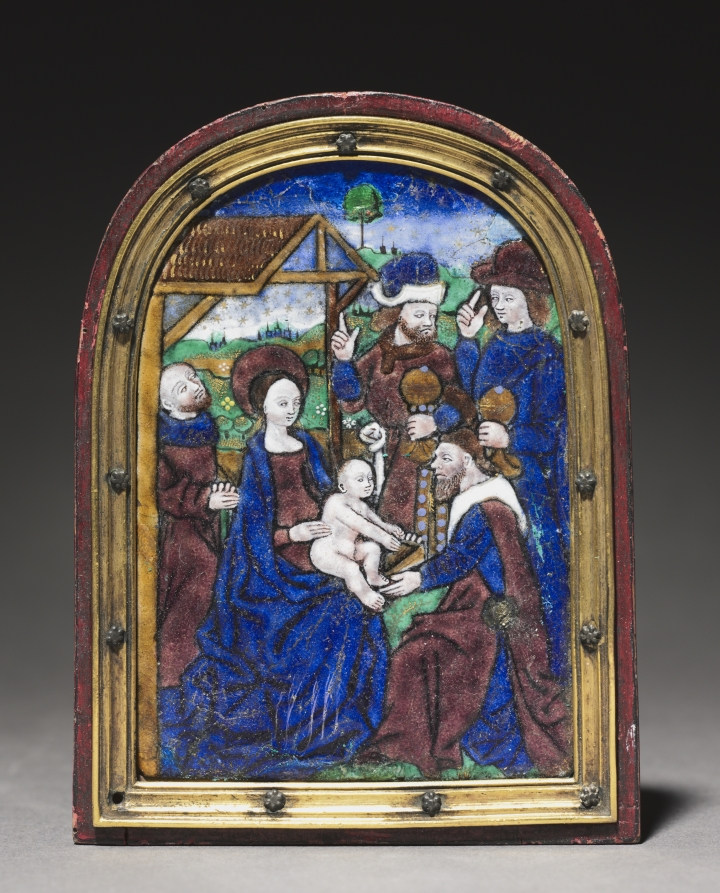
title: Plaque: Adoration of the Magi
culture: France, Limoges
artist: Monvaerni Master (French)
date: c. 1480–1500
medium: painted enamel on copper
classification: Enamel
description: The size and shape of this plaque suggests that it may have originally been an "image de chevet" -- a religious image that was popularly hung from the bed curtain during late medieval times.